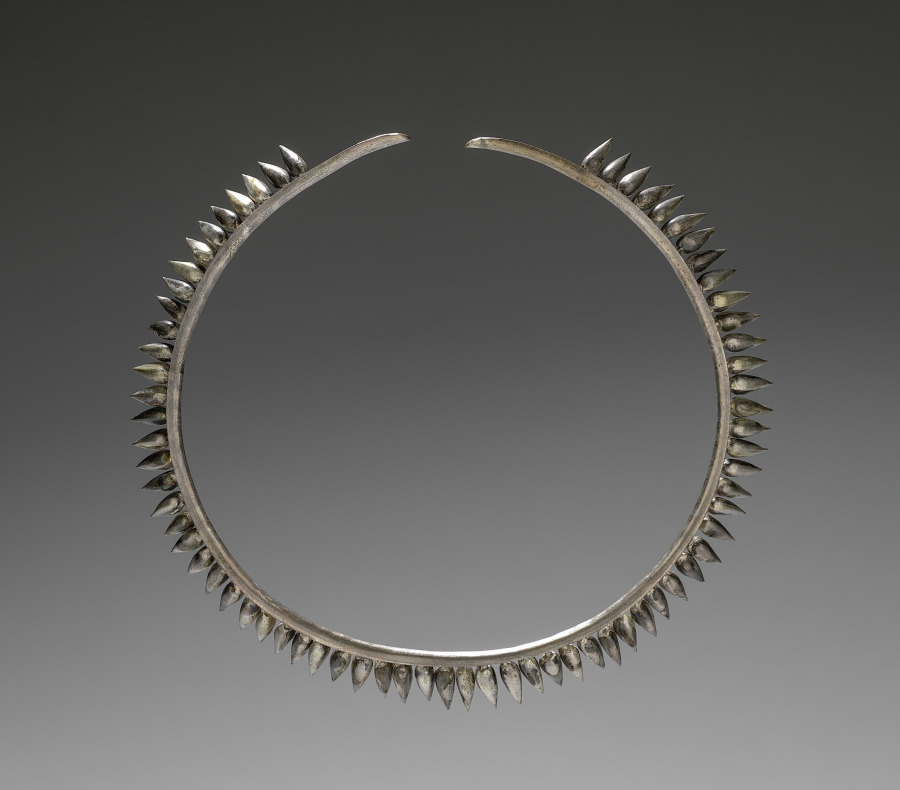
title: Necklace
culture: India (?)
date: 1800s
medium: silver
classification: Jewelry